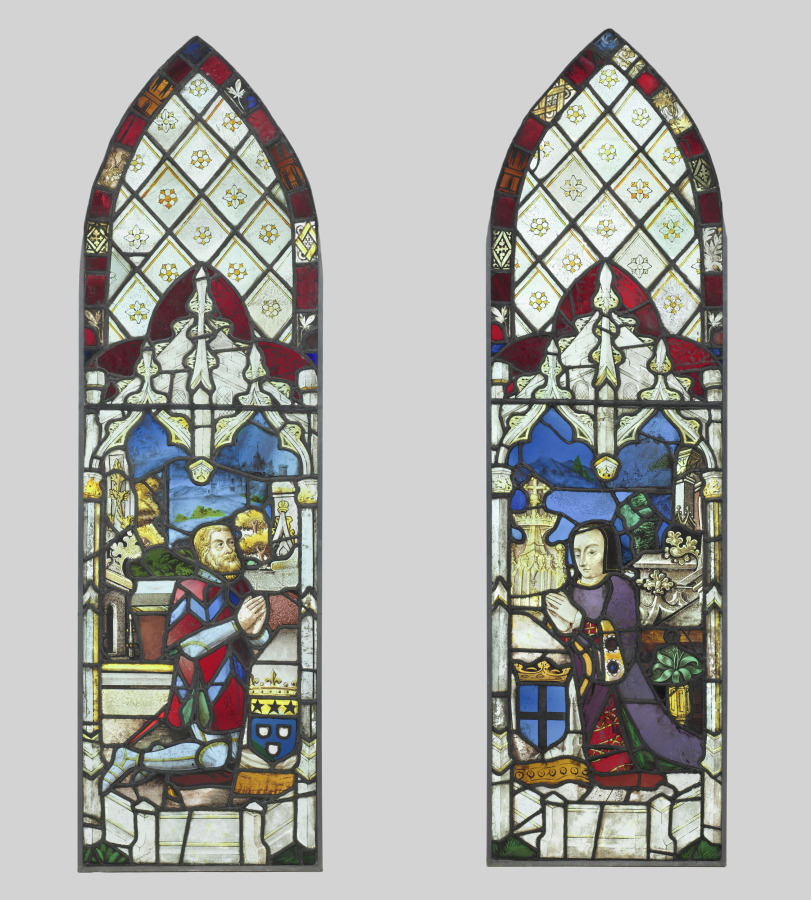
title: Pair of Stained Glass Panels with Male and Female Donor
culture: France, 15th century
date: c. 1480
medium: pot metal, white glass with silver stain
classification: Glass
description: The origin of these stained glass panels is unknown. They depict a male and female donor, presumably husband and wife, who gaze upon a now-lost central panel. The object of their devotions was likely a crucified Christ or a standing figure of the Virgin Mary. The man, dressed in armor, and the woman, wearing a bejeweled and richly embroidered gown, are accompanied by their not yet identified coats-of-arms. They are undoubtedly members of an aristocratic elite who commissioned these windows, perhaps for a family chapel.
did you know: The brilliant colors of this stained glass panel were produced by adding different materials to molten glass, creating a reaction that resulted in specific colors while the metal supports for the individual pieces of glass are made from pot metal, an alloy, or mixture, of copper and iron.